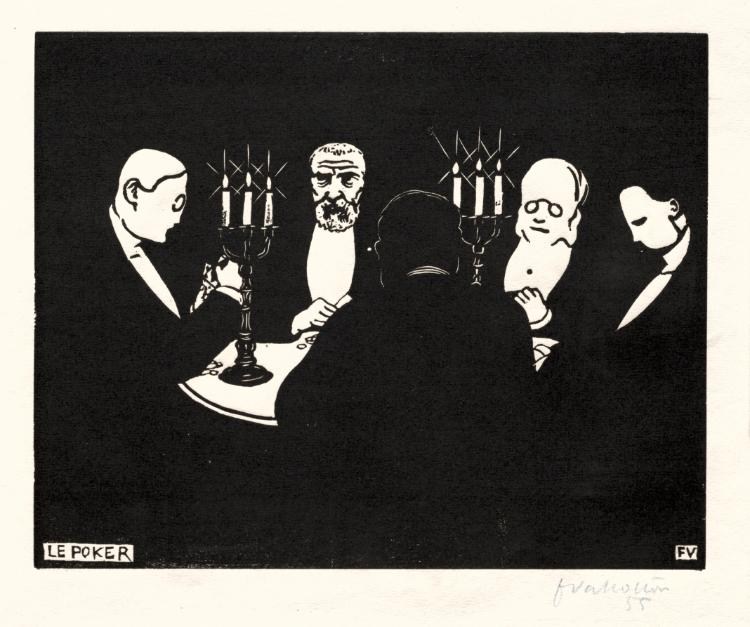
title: Poker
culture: France, 19th century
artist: Félix Vallotton (Swiss French, 1865–1925)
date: 1896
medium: woodcut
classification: Print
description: The bold, simplified style of Vallotton's more than 200 woodcuts made him a central figure in the late 19th-century revival of the medium. With stylized forms and striking contrasts of black and white, Vallotton effectively depicted the personality of each poker player and the brightly lit candelabra in the otherwise darkened room.